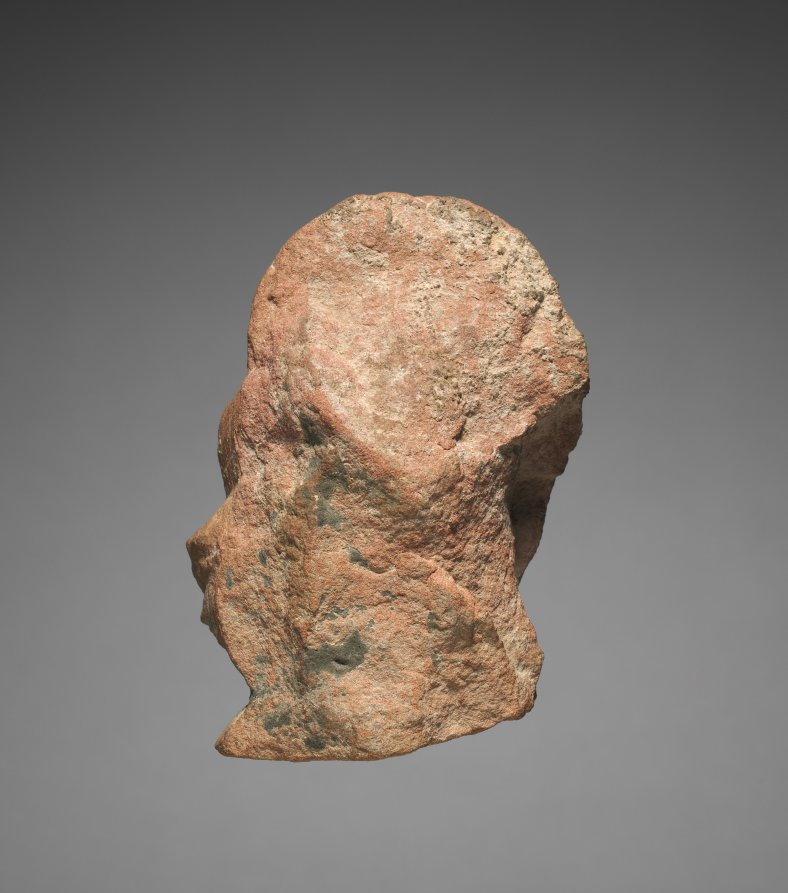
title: Miniature Female Head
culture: India, Mathura, Kushan period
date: 100s CE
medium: sandstone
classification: Sculpture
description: Against the backdrop of the large-scale monumental sculpture for which the Mathura school is justly noted, this miniature head may appear insignificant; however, it exemplifies on a diminutive scale qualities of style and execution that not only parallel developments noticeable on monumental sculpture but also reflect a certain freedom of treatment of facial details that clearly denotes that while the artist worked in a minor key, the creation was neither inconsequential nor a sequacious rendering of the major sculptural trends of large-scale sculptures from Mathura. This small female head is comparable to the yaksi in the CMA's 1965.250 in several readily apparent details of form and type. The dual strands of the large-beaded necklace, the oversized ear ornament, and the hairstyle with the lalatika in the circular, severely defined central section of the coiffure are reductive echoes of the larger sculpture that clearly suggest an analogous date for this head. While repeating some of the features of the yaksi, this small head retains an individuality and distinctness by means of fine details such as the indented secondary line defining the upper lip of the slightly parted mouth and the chiseled clarity of the nose and brows of this sloe-eyed image. The fullness of the facial planes and the sensuous curves of the full, lower lip, while accentuating by contrast the almost metallic quality of the eye and nose, also quite compellingly link this head with the larger yaksis.